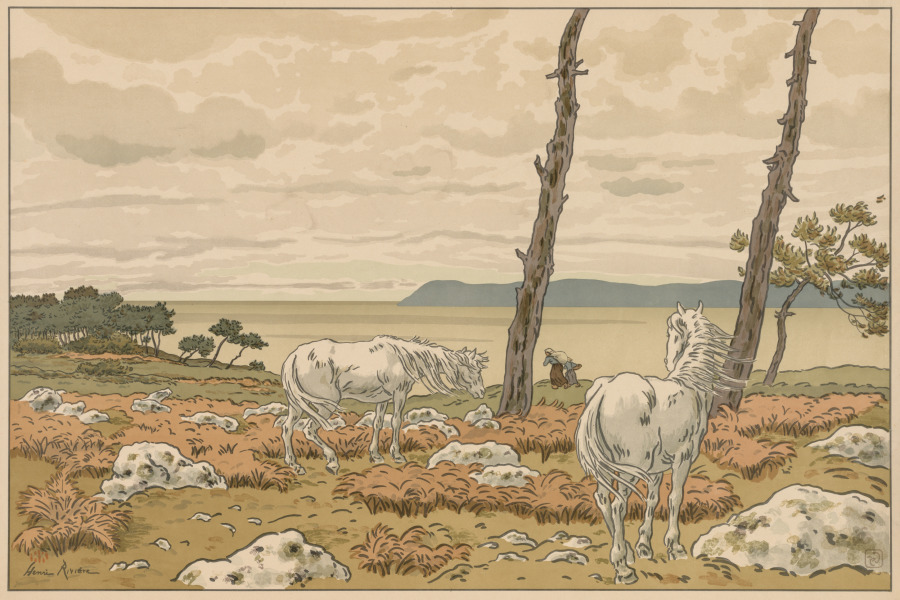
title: Aspects of Nature: The Bay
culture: France, 19th century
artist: Henri Rivière (French, 1864–1951)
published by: Printed by Verneau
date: 1897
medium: color lithograph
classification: Print